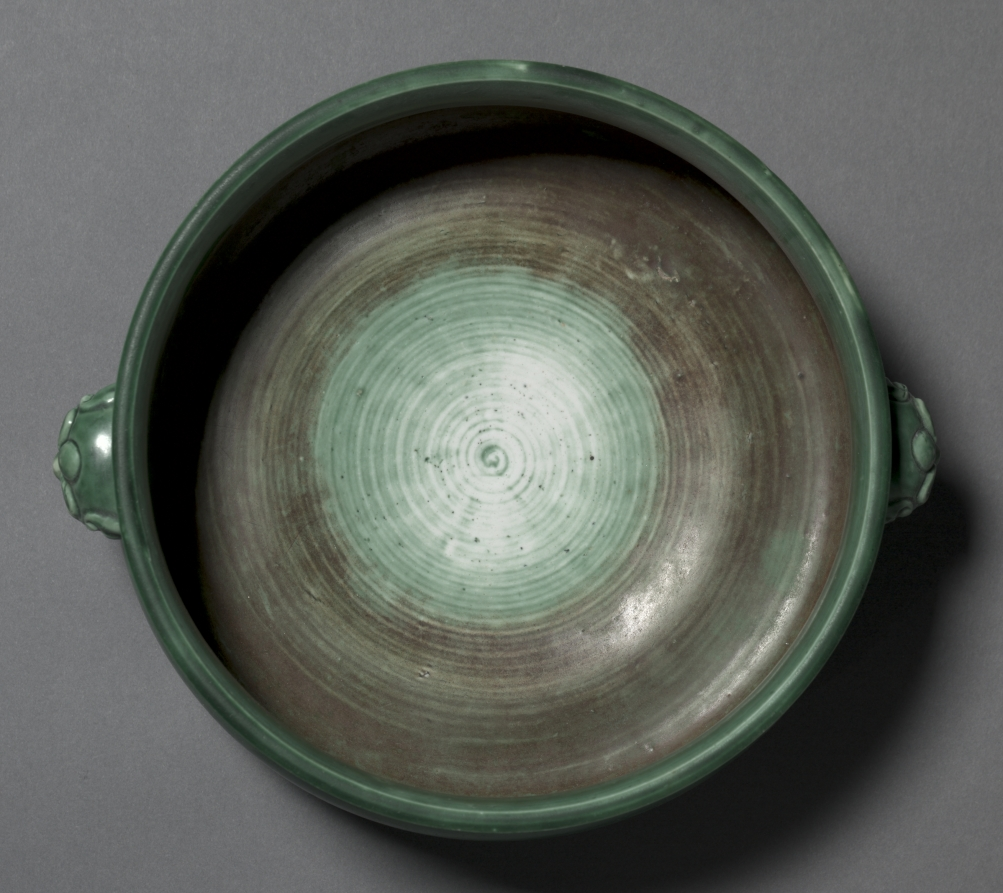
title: Bowl in Form of Archaic Gui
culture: China, Jiangxi province, Jingdezhen, Ming dynasty (1368-1644), Chongzhen reign (1628-44) or Qing dynasty, Shunzhi reign (1644-61), but Ming dynasty (1368-1644), Jiajing mark (1522-66)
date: 1628–61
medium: porcelain with camellia-leaf green glaze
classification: Ceramic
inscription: 大明嘉靖年製